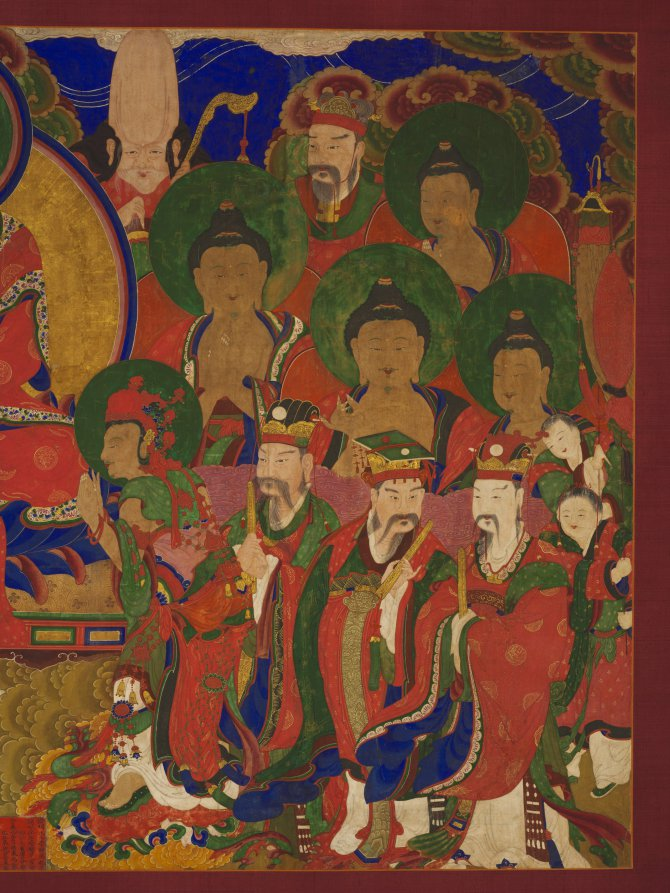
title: The Assembly of Tejaprabha Buddha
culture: Korea, Joseon dynasty (1392–1910)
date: 1878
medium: hanging scroll; ink, color, and gold on silk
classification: Painting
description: The main deity seated at the center is Tejaprabha, the Buddha of Radiant Light. Blazing beams of light emanating from its celestial body are this deity’s weapon to crush all kinds of calamities. Coincidently, when this painting was created, Korea was experiencing a height of foreign military aggressions, including invasions by the French (1866) and the US (1871). The inscription at the bottom center states that a group of ladies from the royal court commissioned the scroll to wish for the well-being of their families. During the late Joseon dynasty, Korean women became largely marginalized. Nevertheless, they remained important patrons of Buddhist art and architecture, voicing their concerns for their country and families in peril.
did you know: The central Buddha of Radiant Light is flanked by two attendant bodhisattvas, Sunlight and Moonlight, each in reverence posture.